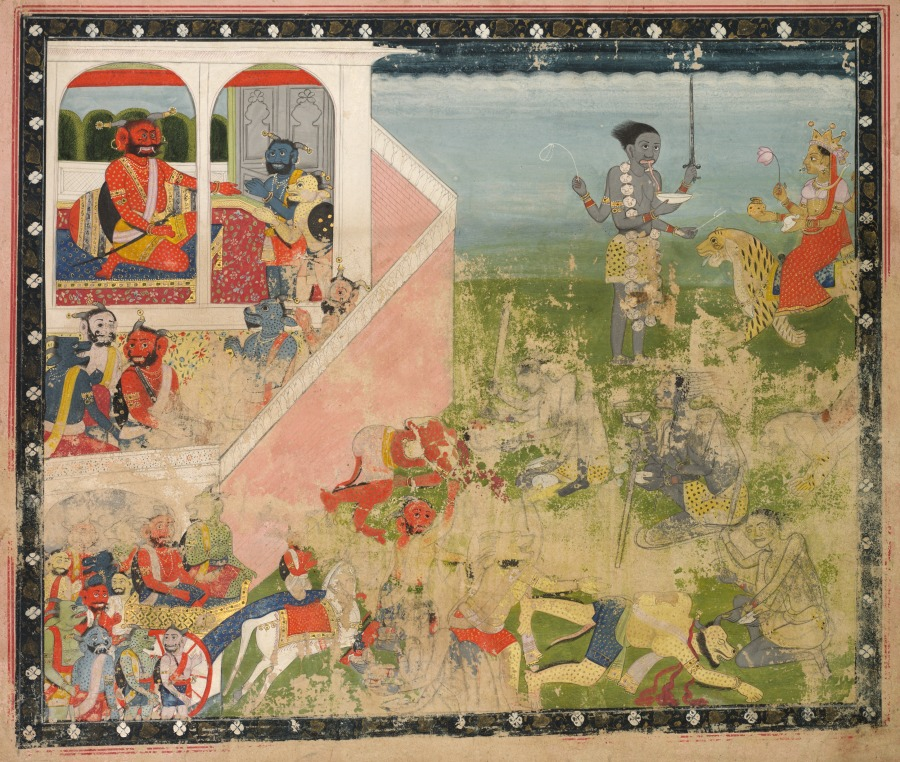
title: Kali and Devi attack, from a Devi Mahatmya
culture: Northern India, Pahari kingdoms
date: c. 1840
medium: Gum tempera, ink, and gold on paper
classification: Painting